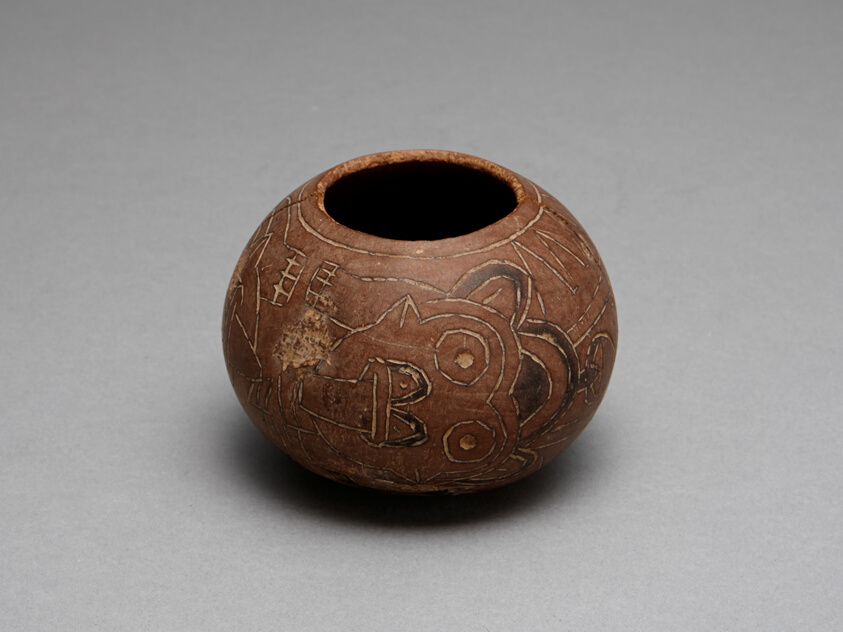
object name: Vessel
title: Bowl Carved with Costumed Ritual Figure With Feline and Serpent Attributes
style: nazca, Arts of the Americas, andes, south american, andean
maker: Nazca; South coast, Peru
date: 180 BCE–500 CE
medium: Gourd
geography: Peru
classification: bowl; art of the americas; vessel